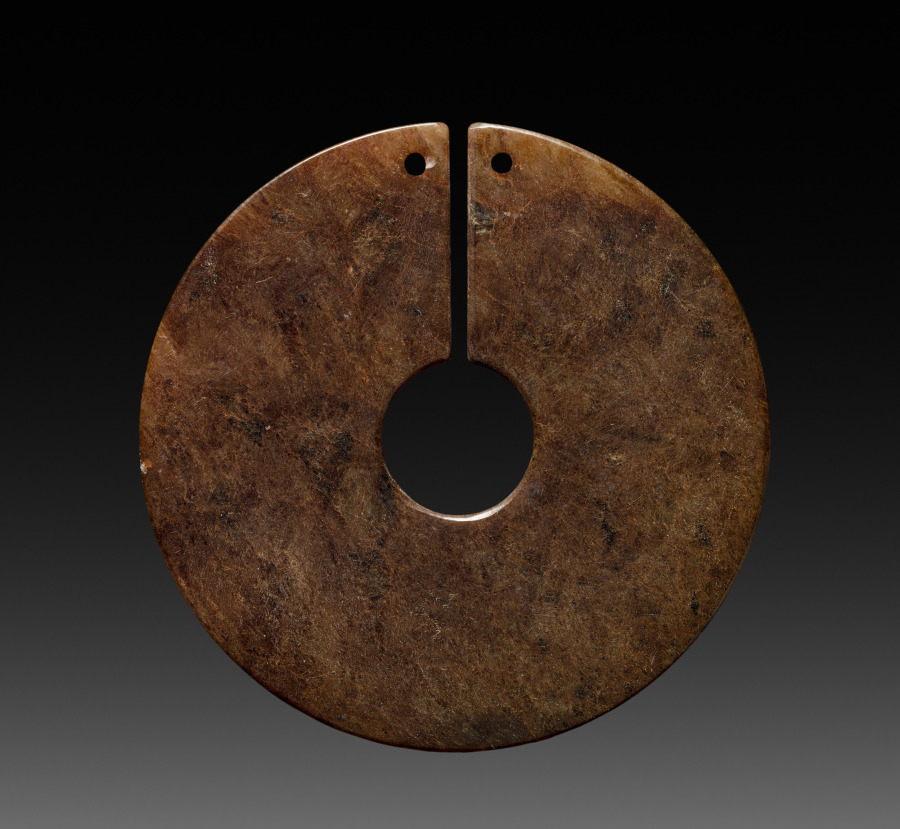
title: Chüeh (Ornament)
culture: China, Han dynasty (202 BCE–220 CE) or earlier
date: 206 BCE–220 CE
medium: jade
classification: Jade